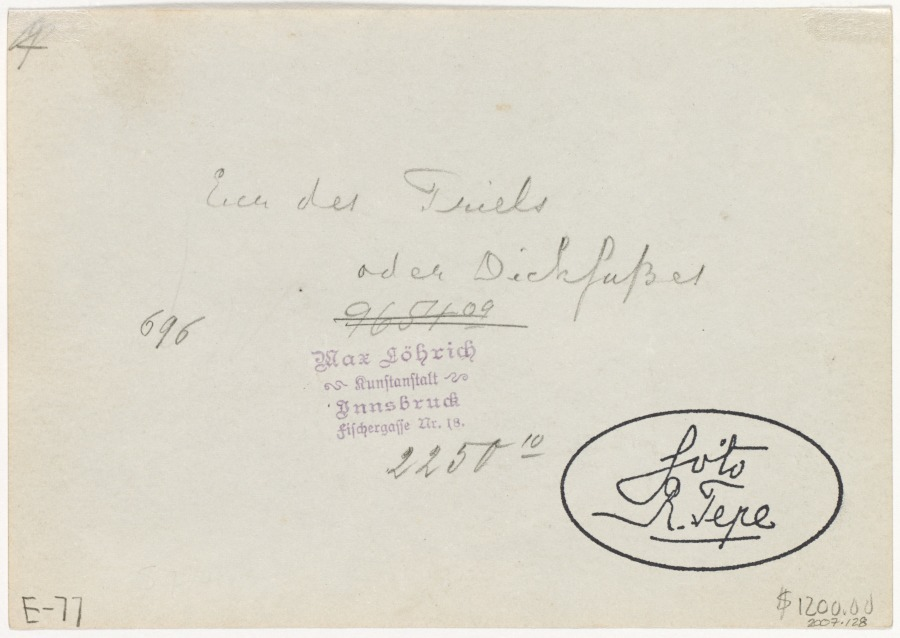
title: Eggs of a Stone-curlew or Plover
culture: Netherlands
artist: Richard Tepe (Netherlandish, 1864–1952)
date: 1900s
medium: silver print on printing out paper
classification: Photograph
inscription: Written in pencil on verso: "2250 10" Written in black ink on verso: "Foto/R.Tepe (signed)"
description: Dedicated to wildlife and natural habitat preservation, Tepe helped bring nature photography into the fine art world. He exhibited his photographs and published articles and pictures in both natural history and art magazines.